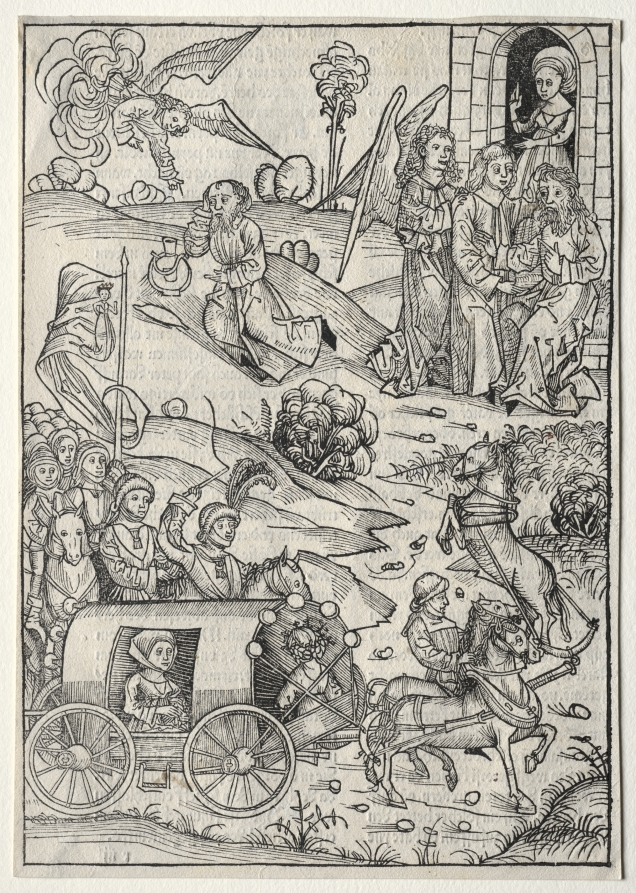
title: Der Schatzbehalter: The Return of Tobias to Tobit; The Arrival of Tobias' Wife; The Angel Bringing Food and Drink to Elijah in the Desert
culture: Germany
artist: Michael Wolgemut (German, 1434–1519)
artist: Wilhelm Pleydenwurff (German, 1450–1494)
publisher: Anton Koberger (German, 1435-1513)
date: 1491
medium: woodcut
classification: Print